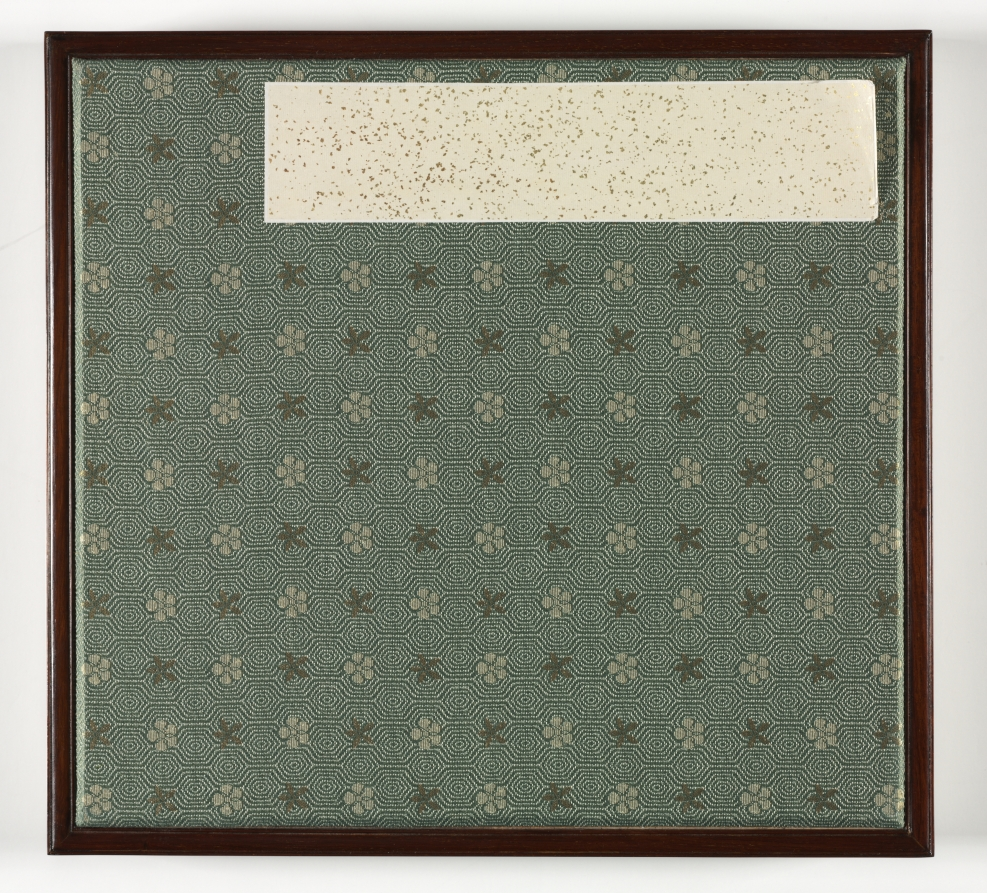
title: Eighteen Views of Huzhou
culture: China, Ming dynasty (1368–1644), Wanli reign (1573–1620)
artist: Song Xu (Chinese, 1525-c. 1606)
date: c. 1588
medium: Album of eighteen leaves; ink and color on silk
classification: Painting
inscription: 包陽湖：自此數里，東出太湖甚近。北至香山可數里。過此即宜興界矣。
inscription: 呂山滙：蓋呂蒙曾屋此而云然。亦弁山餘派也，入郡中必由此。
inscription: 道場山：郡城南去，可五六里，為伏虎禪師道場。上有伏虎亭、望湖亭。南可見武林諸山。北盡震澤群峯之勝。俯窺城郭樓臺，佳麗如畫。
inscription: 碧巖山：山多古木，寺藏其中。今為人侵伐殆盡，遂成荒廢，遊者鮮矣。然嶺崖飛瀑，不減清致。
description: By the 1500s, visits to historic and scenic sites in the lower Yangzi delta stimulated an increase of printed illustrated travel books. Topographical depictions of local scenery flourished. Leaves from this album illustrates sites around Lake Tai of the two adjacent counties Changxing and Wuxing (modern Huzhou). Song Xu, who lived intermittently in Jiaxing and Songjiang, must have passed through Wuxing by boat and thus knew the region. The paintings are inscribed with gazetteerlike notations, suggesting that the album was produced for clients as commemorative works, a travel guide, or for “armchair travel” (woyou) in one’s mind.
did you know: Song Xu favored a painting style that was technically polished and focused attention on specific, realistic details.